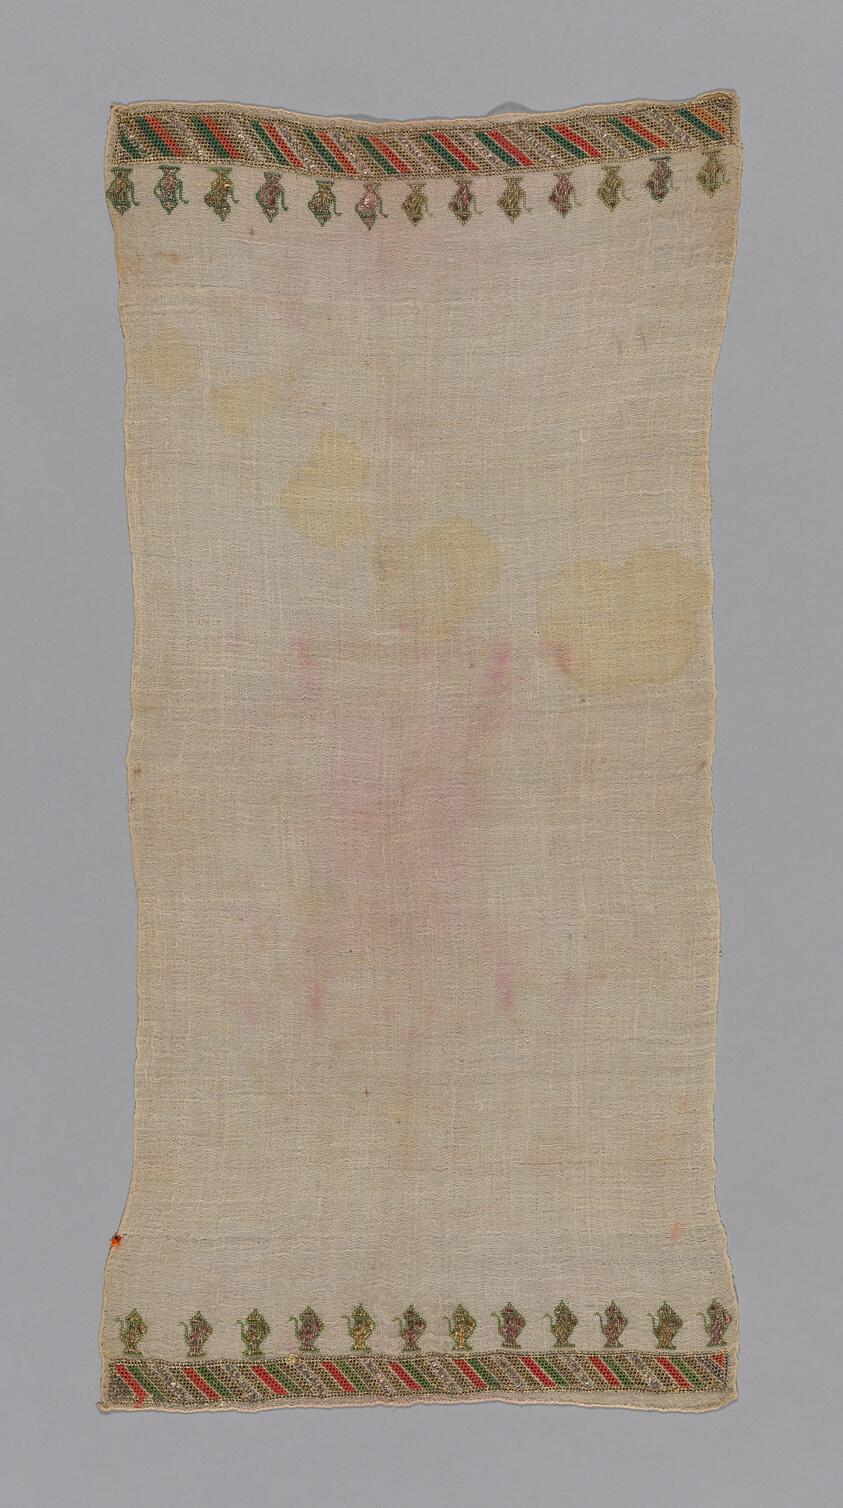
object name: Textile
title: Towel or Napkin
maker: Turkey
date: 19th century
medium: Embroidered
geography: Turkey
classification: textile; needlework (visual works); weaving